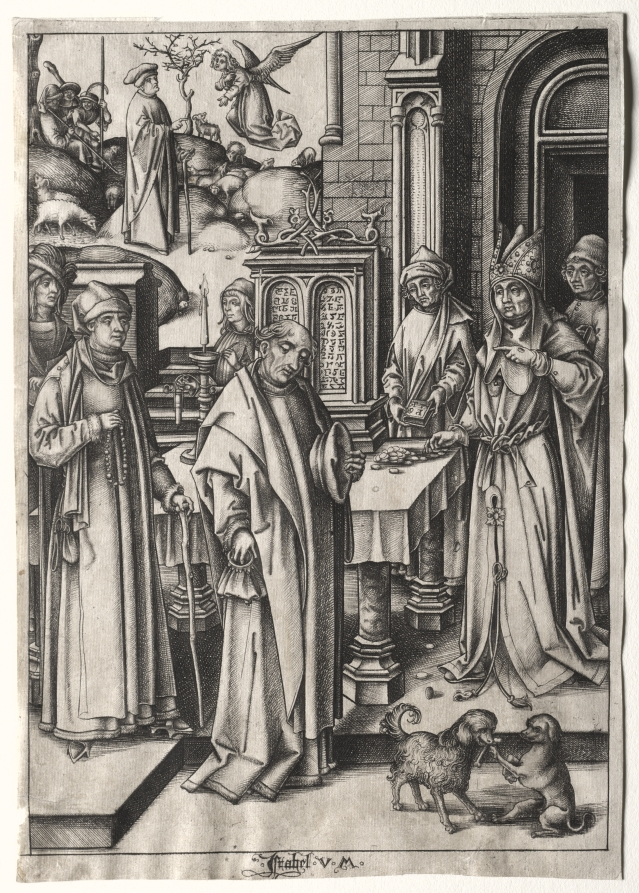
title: Life of the Virgin: High Priest Rejecting the Offering of Joachim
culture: Germany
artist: Israhel van Meckenem (German, c. 1440–1503)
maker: after Hans Holbein (German, c. 1465–1524)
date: c. 1493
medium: engraving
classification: Print